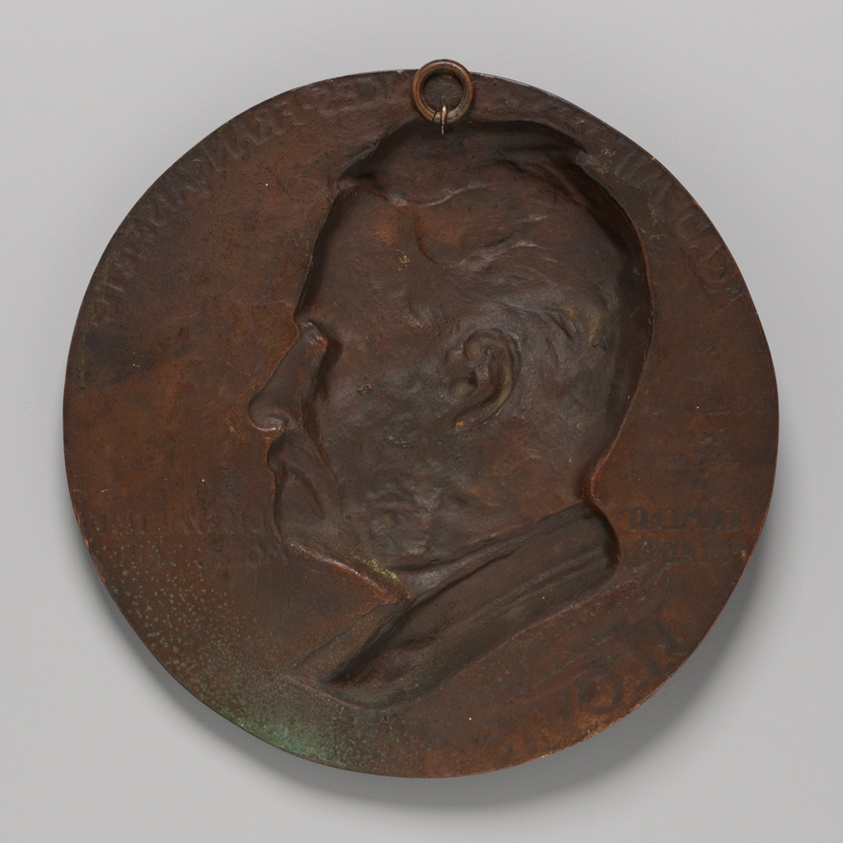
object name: Medals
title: Louis Pasteur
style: 19th century, classicism, classical revival, france, nineteenth century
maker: Jean Désiré Ringel d'Illzach (French, 1847–1916)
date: 1884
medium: Bronze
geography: France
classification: medal; medal/plaquette/coin; medallion; bronze; french; metal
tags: portrait, faces, portrait: French subject, man, portraits, portraits: male subject, profile